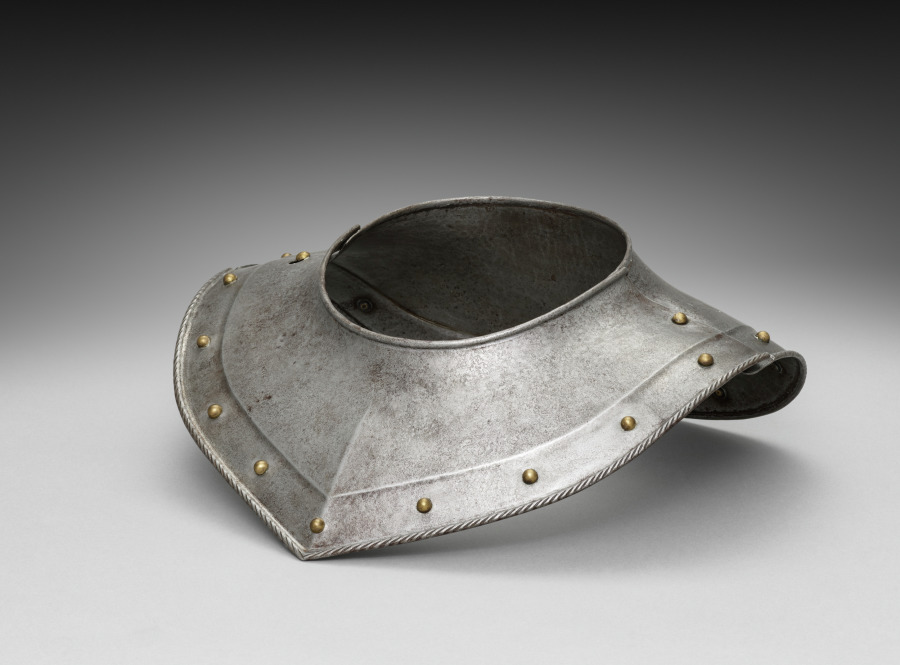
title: Colletin (two pieces)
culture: Germany, 19th century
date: 1801–1900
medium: steel with black paint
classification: Arms and Armor